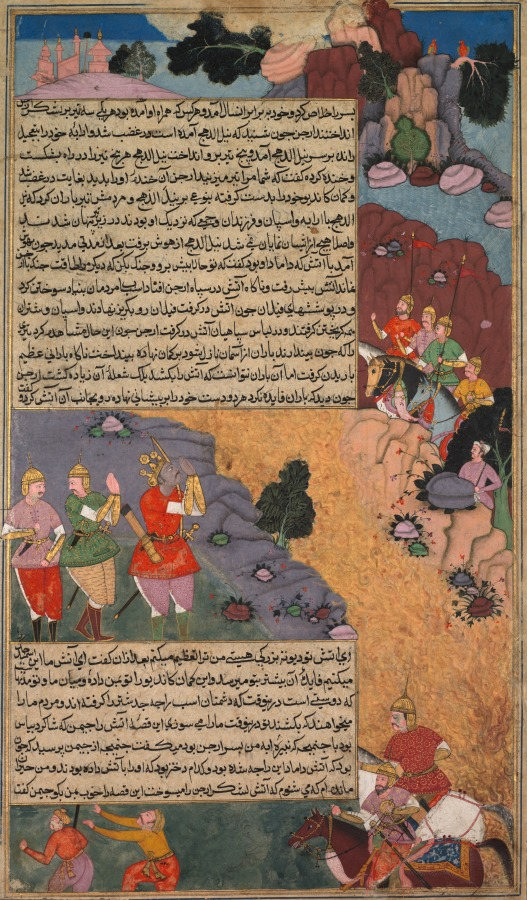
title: The First Adventure of the White Horse, Page from the Khan Khanan's Razm Nama (Book of Wars)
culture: India, Subimperial Mughal school, 17th century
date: c. 1610–17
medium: Gum tempera, ink, and gold on paper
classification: Painting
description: After the five Pandava brothers defeated their cousins, the oldest, who became king, performed an ancient Vedic ritual known as the horse sacrifice in order to determine the physical extent of his rule. For one year a horse wanders freely around the country, attended by warriors, and every land through which the horse passes becomes part of the king’s territory. The warriors go to battle with any local resistance. In this case, the warrior following the horse is Arjuna, one of the five Pandava brothers. He has encountered the son-in-law of the god of fire, Agni, who creates a river of fire to block the warriors. In a dramatic composition set on the banks of the swirling golden river of fire, running diagonally down the page between multicolored rocky outcrops, Arjuna, dark-skinned and crowned, pleads with Agni, the god of fire. He prays that the horse be allowed to pass, saying that the horse sacrifice is in accordance with sacred Vedic injunctions, and that at the end of the year, the horse will be sacrificed to him, the god of fire himself.